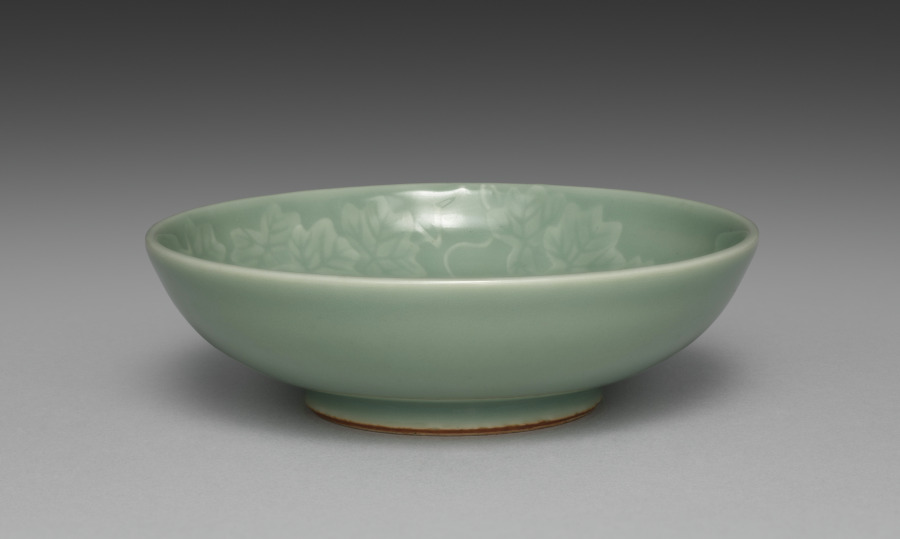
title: Dish from Dishes with Ivy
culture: Japan, Meiji period (1868–1912)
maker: Seifū Yohei III (Japanese, 1851–1914)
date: 1893–1914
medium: One from a set of five dishes; porcelain with green glaze and molded designs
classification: Ceramic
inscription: 清風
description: Yohei III’s main output for his sophisticated clientele was in the form of tea sets and dining sets. He often produced in pairs, sets of five, or sets of ten. This set of five dishes with a green glaze and designs of ivy vines in very low relief has unfortunately lost its box. These dishes are slightly larger than the other dishes, like CMA 2022.187, and so may have been not saucers but rather small plates for meals.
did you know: In his career, Seifū Yohei III created a range of dishes in green glazes.